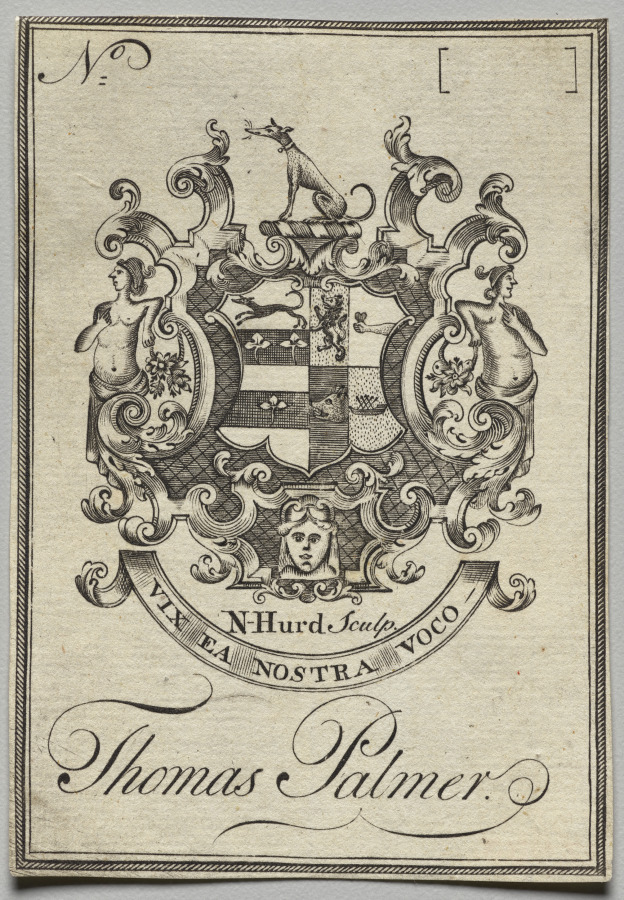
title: Bookplate: Coat of Arms with Thomas Palmer inscribed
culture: America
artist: Nathaniel Hurd (American, 1730–1778)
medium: engraving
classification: Print